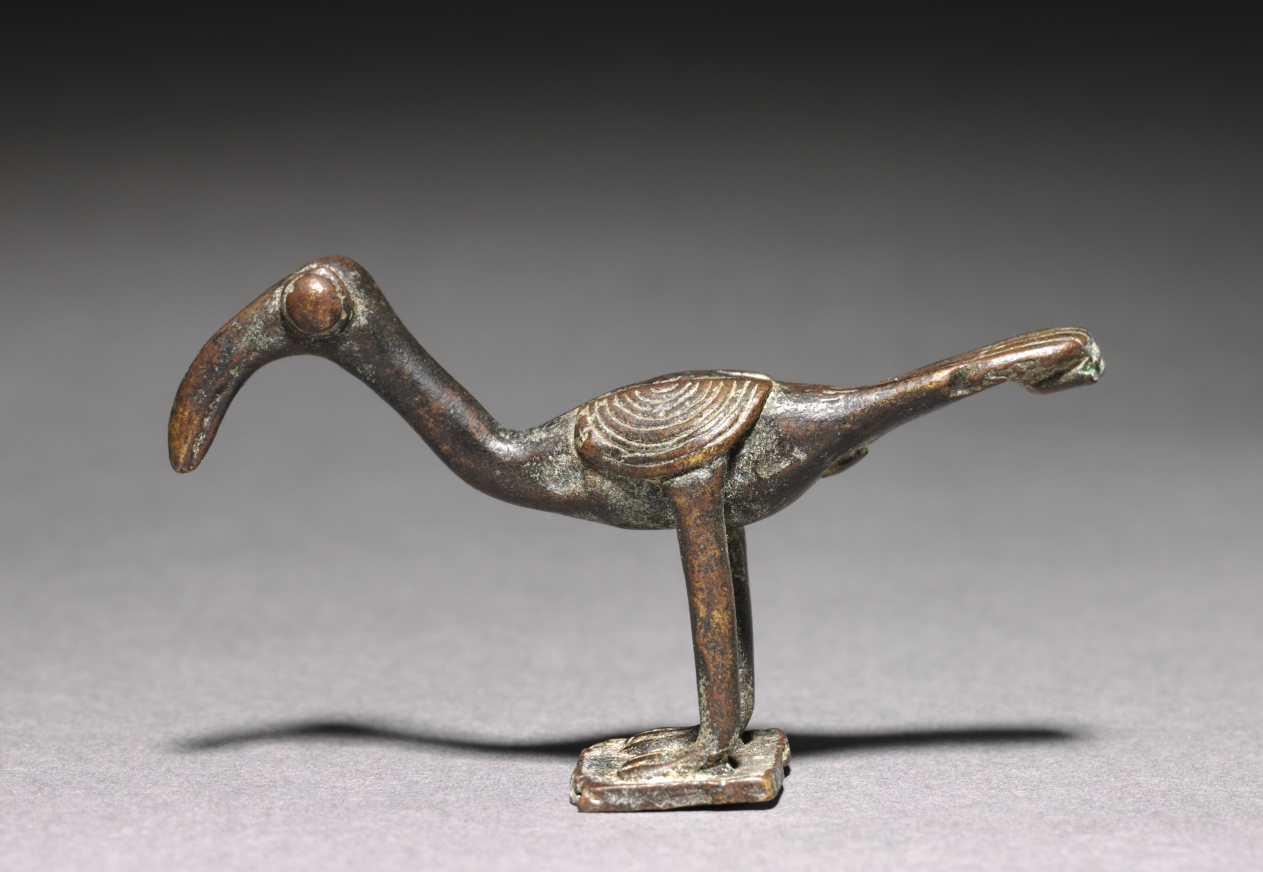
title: Hornbill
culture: Africa, West Africa, Côte d'Ivoire, Senufo style, unknown maker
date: 1900s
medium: Copper alloy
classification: Sculpture